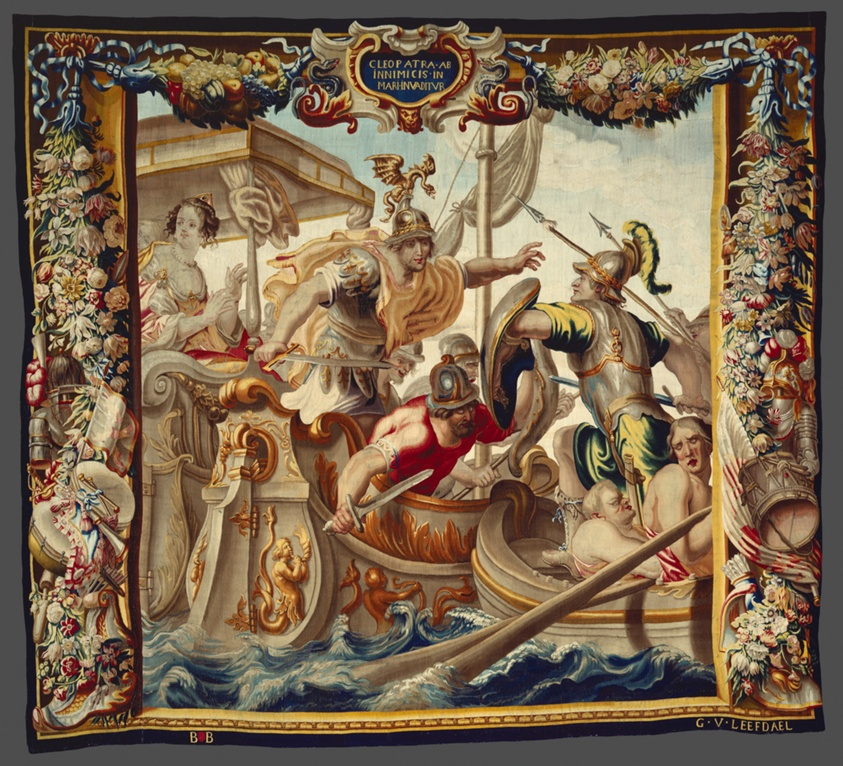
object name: Textile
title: The Battle of Actium from The Story of Caesar and Cleopatra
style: 17th Century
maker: After a design by Justus van Egmont (1601–1674); Woven at the workshop of Willem van Leefdael (1632–1688); Flanders, Brussels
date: c. 1680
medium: Wool and silk, slit and double interlocking tapestry weave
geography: Brussels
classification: weaving - tapestry; textile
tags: battles, armor, swords, shields, boats, spears, helmets, waves, cleopatra